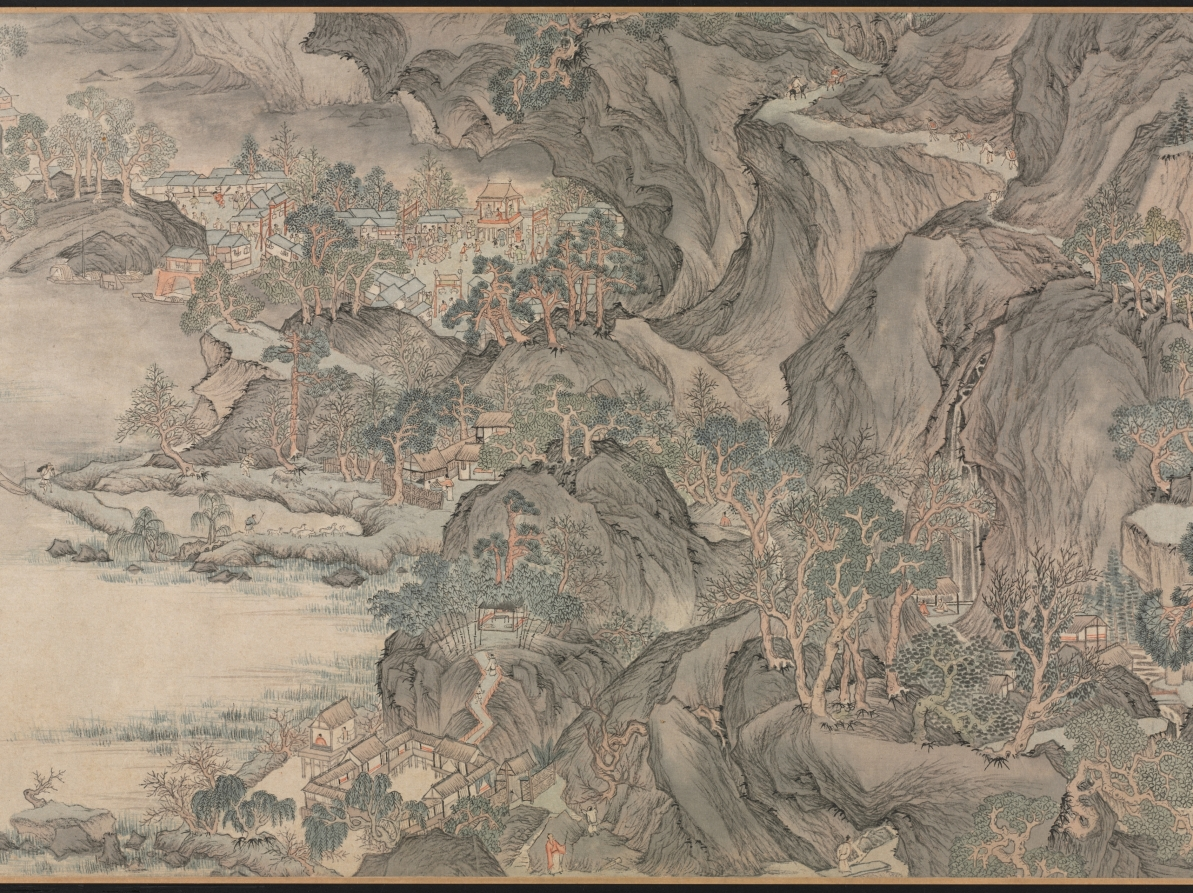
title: Greeting the Spring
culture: China, Ming dynasty (1368–1644)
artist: Wu Bin (Chinese, active c. 1591–1626)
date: 1600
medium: handscroll; ink and light color on paper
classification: Painting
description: This masterfully composed landscape in light colors and delicate brushwork is an image of the water-rich Jiangnan region in southeast China, where Wu Bin was active as an artist. Embedded in rolling hills along lakesides and streams nestle cityscapes hosting numerous spring festivities. Lantern displays and street performances in the villages salute the New Year, and are interwoven with scenes of farming, fishing, and silk making. In one scene in the middle ground, an ox made of clay under a canopy is lead in a procession to an architectural compound, a ceremony known as whipping the spring ox in hope for a good harvest. This handscroll bears five collector seals by the Qianlong emperor indicating his appreciation for the painting.